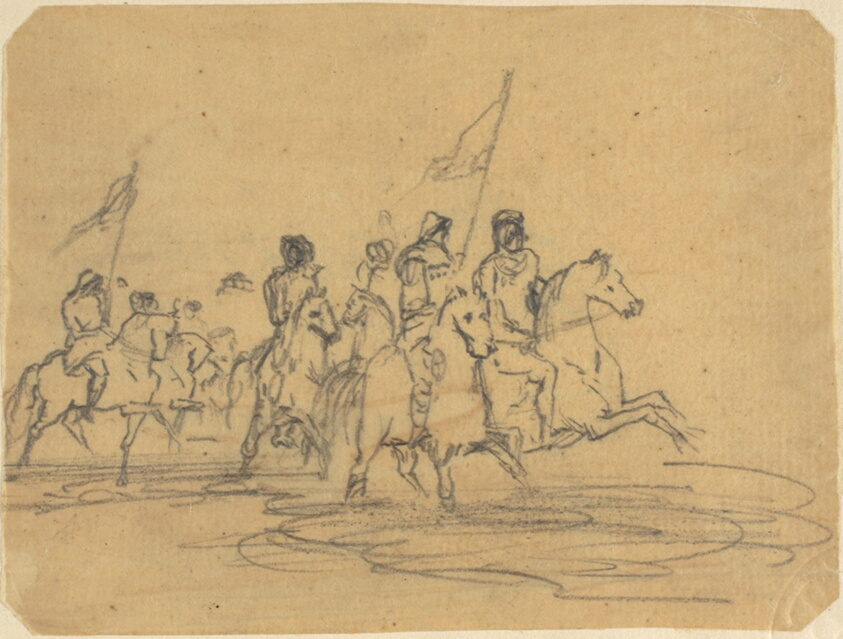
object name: Drawing and Watercolor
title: Sketch for Redon's first etching, The Ford (M. 2)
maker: Odilon Redon (French, 1840-1916)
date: 1865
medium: Graphite on cream tracing paper, discolored to tan, laid down on cream laid paper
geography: France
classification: graphite; drawings (visual works); prints and drawing; paper